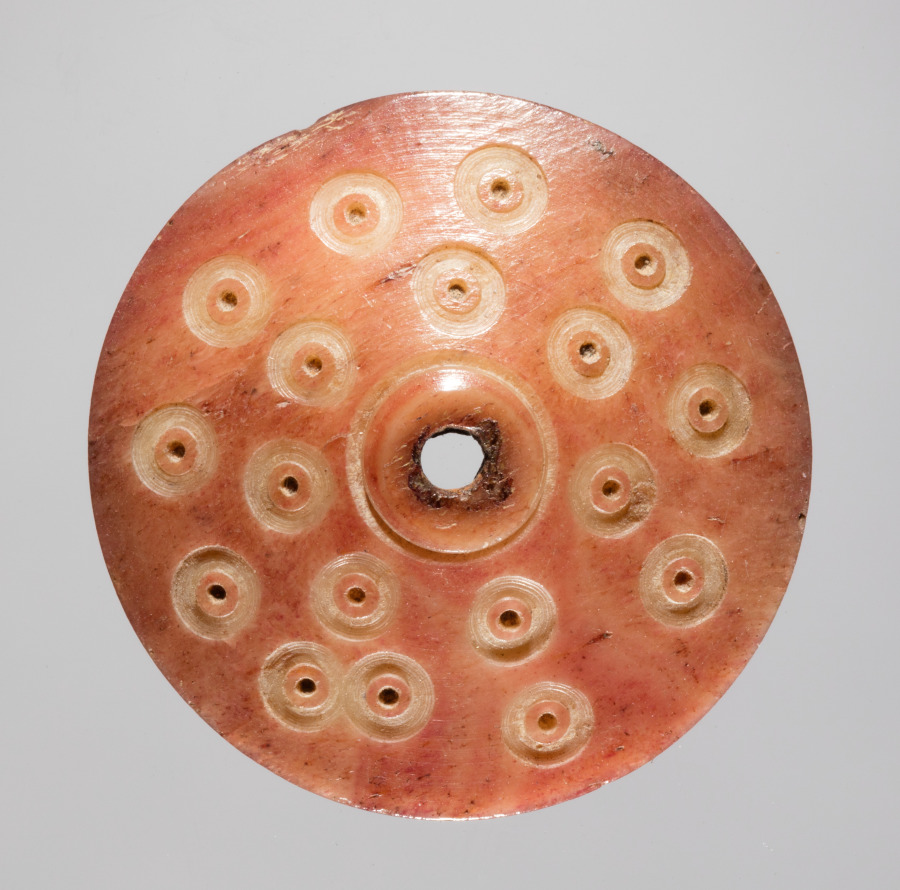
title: Spindle Whorl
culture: Iran, early Islamic period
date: 700s - 900s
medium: bone, incised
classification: Spindle Whorl